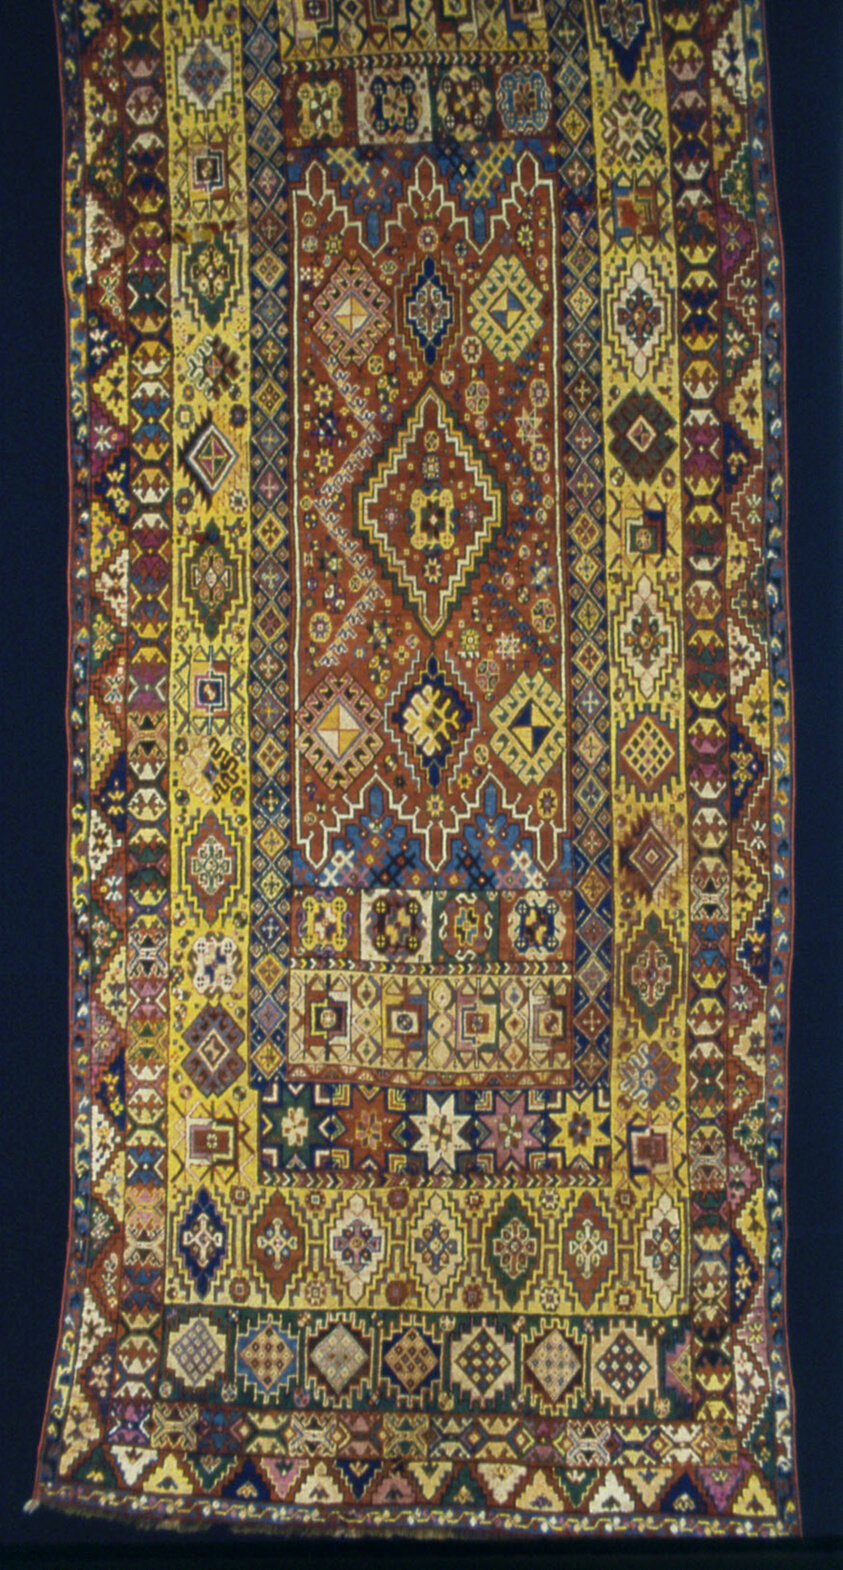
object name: Textile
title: Carpet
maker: Morocco, Rabat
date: 1875–1900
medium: Wool, plain weave with supplementary wrapping wefts forming cut pile through a technique known as "Turkish" (Ghiordes) knots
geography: Morocco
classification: weaving - carpet; textile